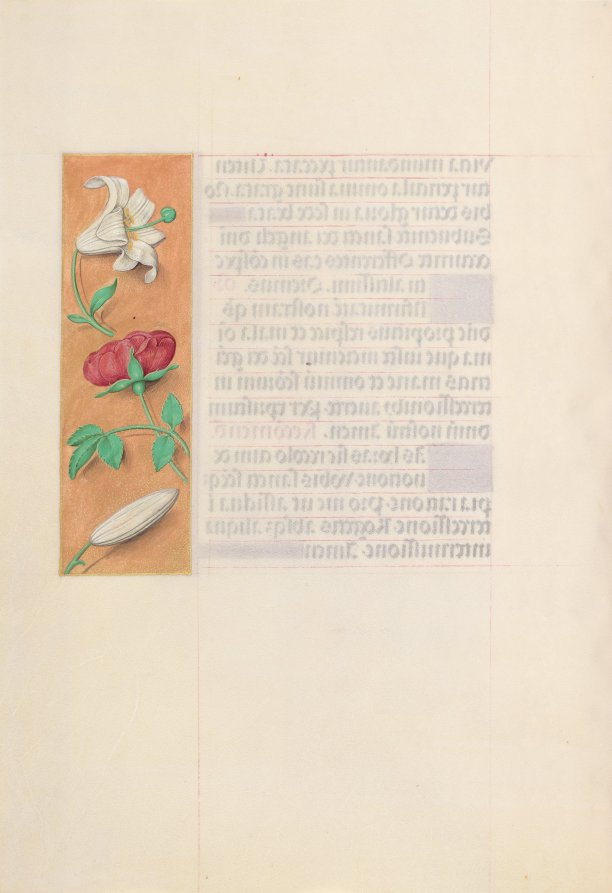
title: Hours of Queen Isabella the Catholic, Queen of Spain: Fol. 42v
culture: Flanders, Ghent and Bruges, late 15th century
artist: Master of the First Prayerbook of Maximillian (Flemish, c. 1444–1519)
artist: and Associates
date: c. 1500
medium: ink, tempera, and gold on vellum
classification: Bound Volume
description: This manuscript was illuminated by a circle of at least five highly organized manuscript painters active in the Flemish cities of Ghent and Bruges. The principal illuminator was Alexander Bening, who painted the majority of the book's miniatures. Manuscripts produced by this circle of artists are renowned for the decoration of their borders, which typically feature a rich variety of realistically-painted flowers, birds, and butterflies. This prayer book, called a book of hours, was intended not for a cleric, but for the private devotions of a lay person-in this case, Isabella the Catholic, Queen of Spain (1451-1504). Isabella's coat of arms embellishes the book's frontispiece. It is unlikely that the book was commissioned by the Queen herself; rather, she probably received it as a diplomatic gift from someone courting her patronage, perhaps Cardinal Francisco Jimenez de Cisneros. A Franciscan friar, Jimenez was dependent upon Isabella for his advancement, first to the post of Queen's confessor in 1492, and then to Archbishop of Toledo in 1495.